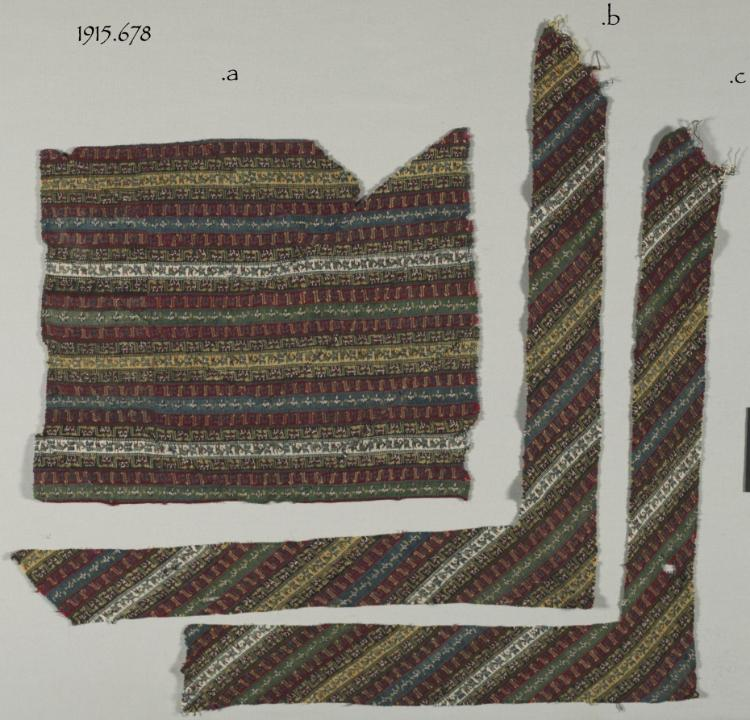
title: Fragment of a Border of a Shawl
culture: India, Kashmir, 19th century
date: 19th century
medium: twill weave, brocaded; wool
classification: Textile